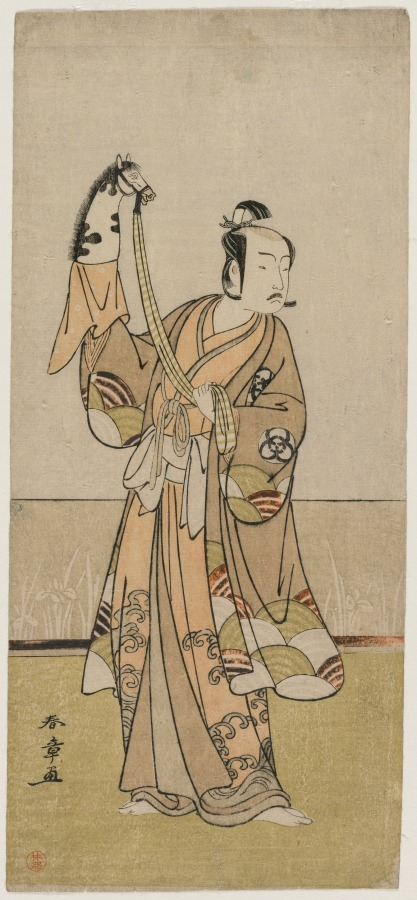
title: Bando Hikosaburo III Holding a Hand Pupper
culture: Japan, Edo period (1615–1868)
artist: Katsukawa Shunshō (Japanese, 1726–1792)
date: mid 1770s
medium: color woodblock print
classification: Print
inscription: Signature: Shunsho ga